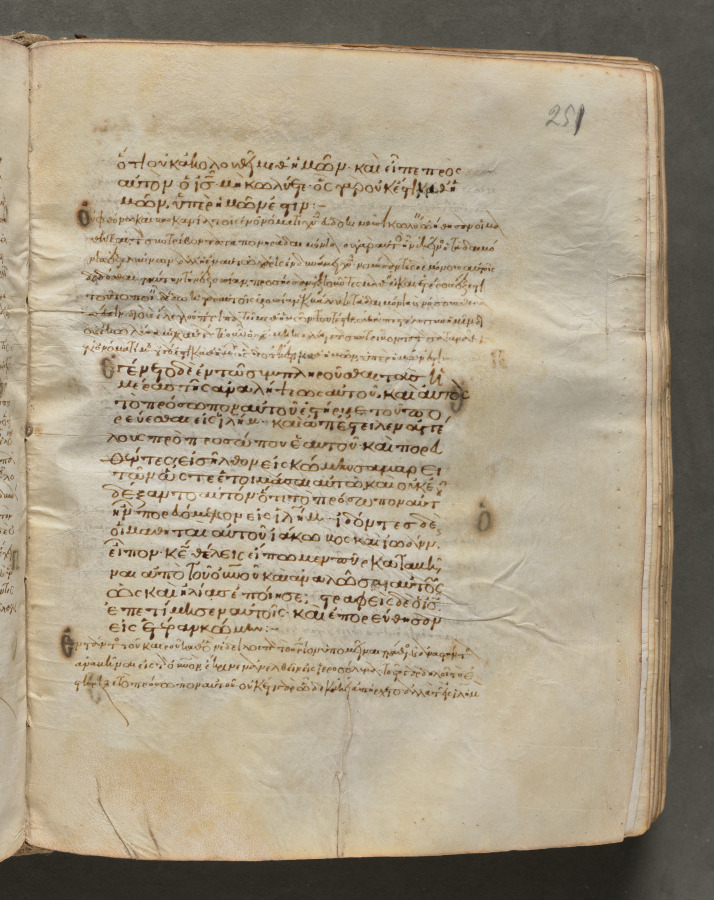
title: Text, folio 251 (recto), from a Gospel Book with Commentaries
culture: Byzantium, Constantinople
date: c. 1000–1100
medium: ink, tempera, and gold on vellum; leather binding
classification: Bound Volume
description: Each of the four gospels in this book opens on a page with brilliantly illuminated borders depicting the author of the text as well as birds—principally peacocks, symbols of the immortality of the soul—and fountains, representing the fountain of life and the salvation of the soul. This volume consists of 428 leaves with texts in Greek. Its level of sophistication suggests that it was probably written and decorated in a monastery in Constantinople.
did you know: Gospel books were carried in procession through Byzantine churches.